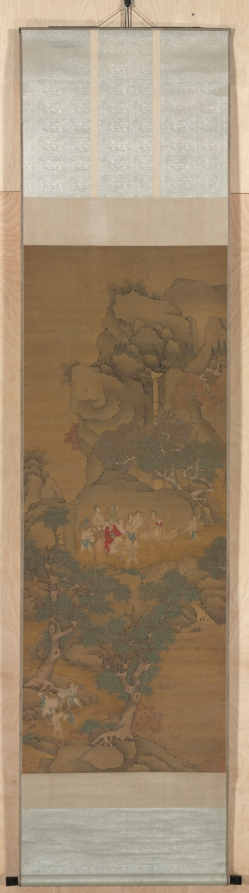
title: Xu Jingyang Moving His Family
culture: China, Ming dynasty (1368–1644)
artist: Cui Zizhong (Chinese, 1574–1644)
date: 1644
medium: Hanging scroll; ink and color on silk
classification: Painting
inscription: Artist's 2 seals: Pei-hai, Cui Zizhong yin.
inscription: 9 additional seals: 2 of Xiang Yuan (18th-19th c.); 1 of Tang Zuomei (late 18th-19th c.); 1 of Zhang Heng 張珩 (1915-1963); 1 of C. C. Wang 王季遷 (1907–2003); 4 unidentified.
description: Xu Jingyang was a dedicated fourth-century Confucian official who allegedly turned into a Daoist immortal. This scroll depicts the legend that when he attained immortality, he took his entire household, including chickens and dogs, to paradise. Cui Zizhong’s painting style intentionally referenced ancient masters. Typical of the pre-Song dynasty landscape tradition, there is the use of blue and green colors and an emphasis on outline rather than texture. While the trembling outlines are reminiscent of earlier painters, the flickering light on rocks and trees is a stylistic feature of Cui’s own time.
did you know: Xu Jingyang, wearing red, is in the upper register of figures, while below his servants transport a rooster, dog, and other supplies.